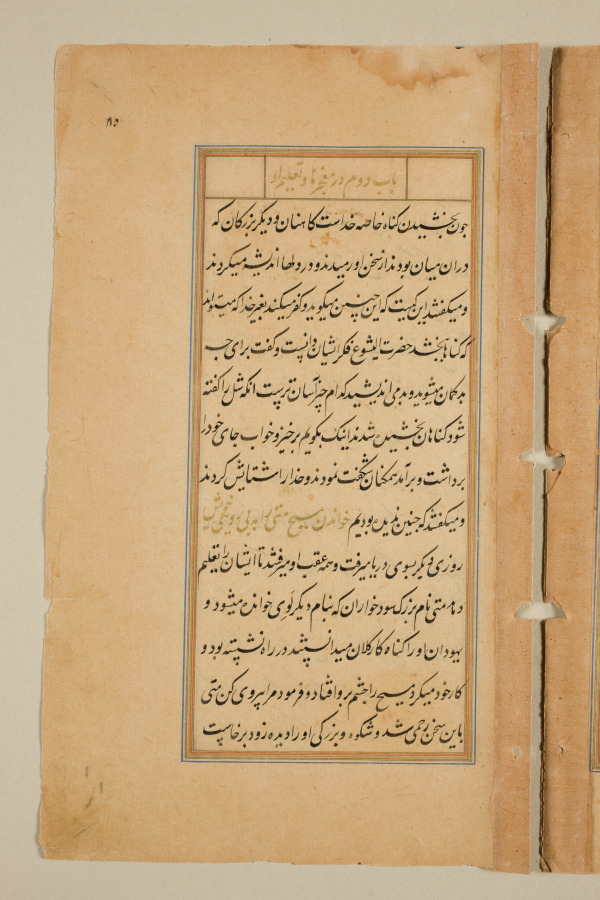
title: Text page from a Mirror of Holiness (Mir’at al-quds) of Father Jerome Xavier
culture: Mughal India, Allahabad, made for Prince Salim (1569–1627)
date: 1602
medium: Ink and gold on paper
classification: Manuscript